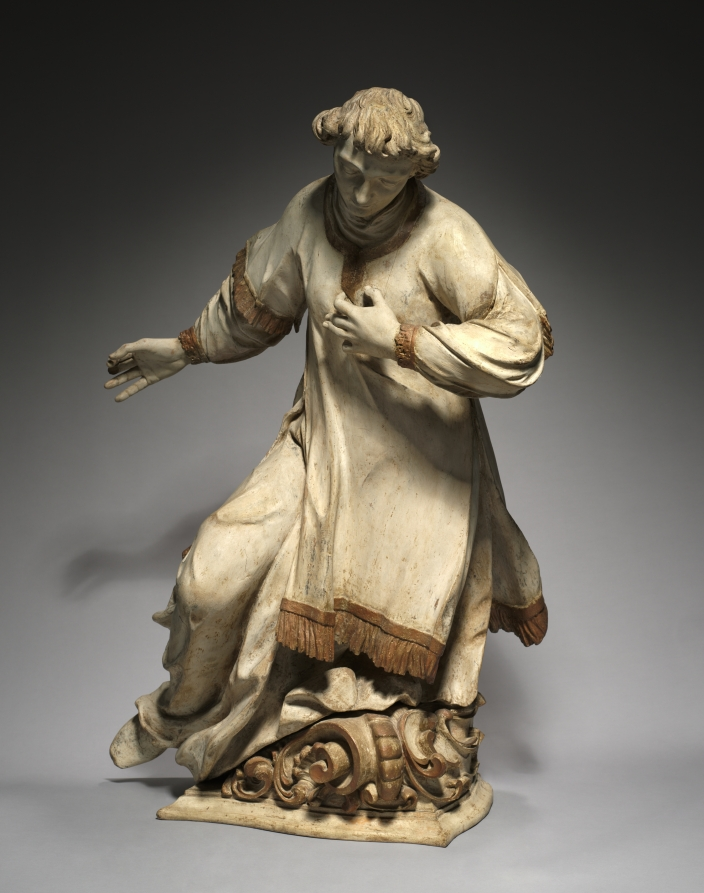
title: Kneeling Saint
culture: Germany, Munich, second half 18th century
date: 1750–1800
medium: painted and gilded wood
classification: Sculpture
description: This serene figure would originally have been part of a larger group, perhaps shown kneeling in adoration of Christ or the Virgin. He wears a knee-length dalmatic, the ecclesiastical dress of deacons (ordained ministers in the Catholic Church). Saints Lawrence and Stephen were among the most popular deacon saints, but lacking an identifying attribute—probably once attached to the saint’s outstretched hand—it is not possible to associate this figure with a specific saint.